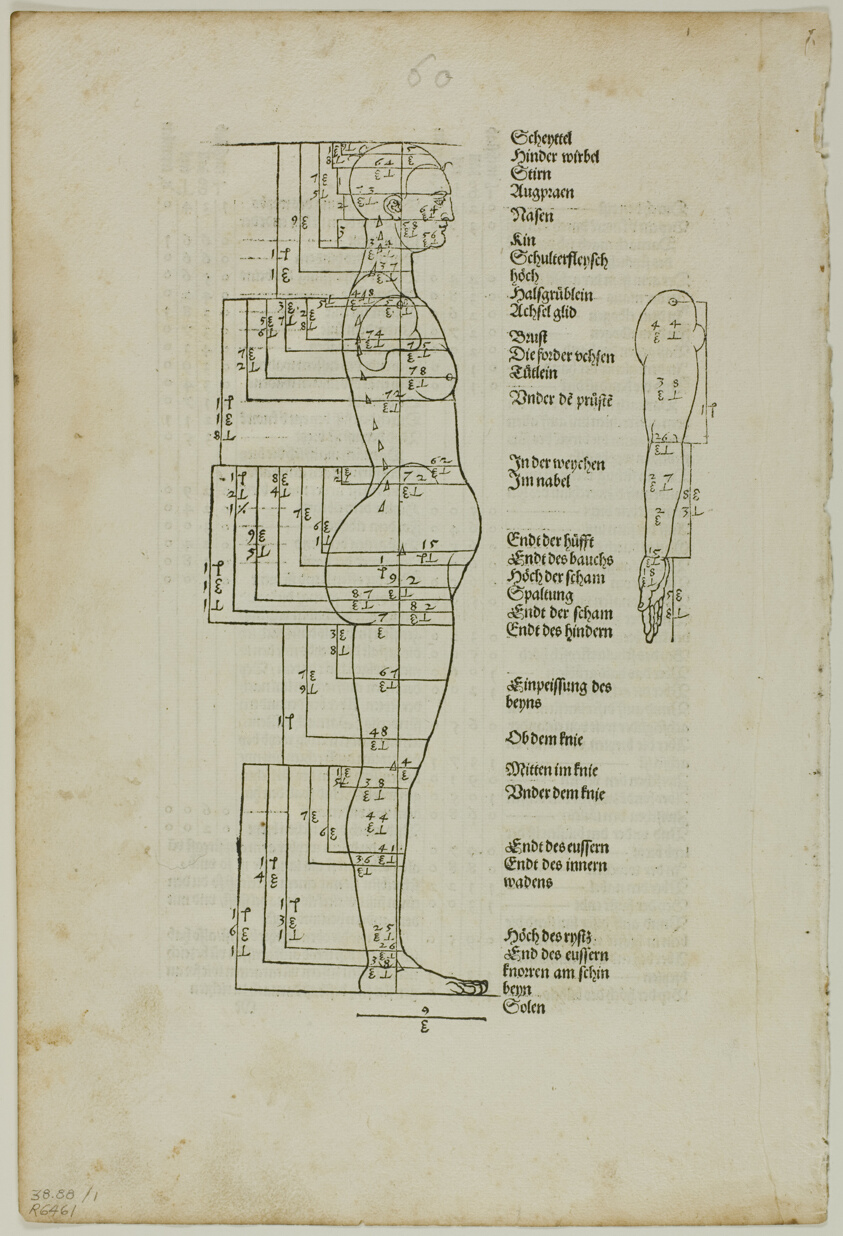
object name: Print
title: Illustration to Vier Bücher von der Menschlichen Proportion, plate one from Woodcuts from Books of the XVI Century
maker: Albrecht Dürer (German, 1471-1528); assembled by Max Geisberg (Swiss, 1875-1943)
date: 1528, assembled into portfolio 1937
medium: Woodcut in black on ivory laid paper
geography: Germany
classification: woodcut; print; prints and drawing; paper